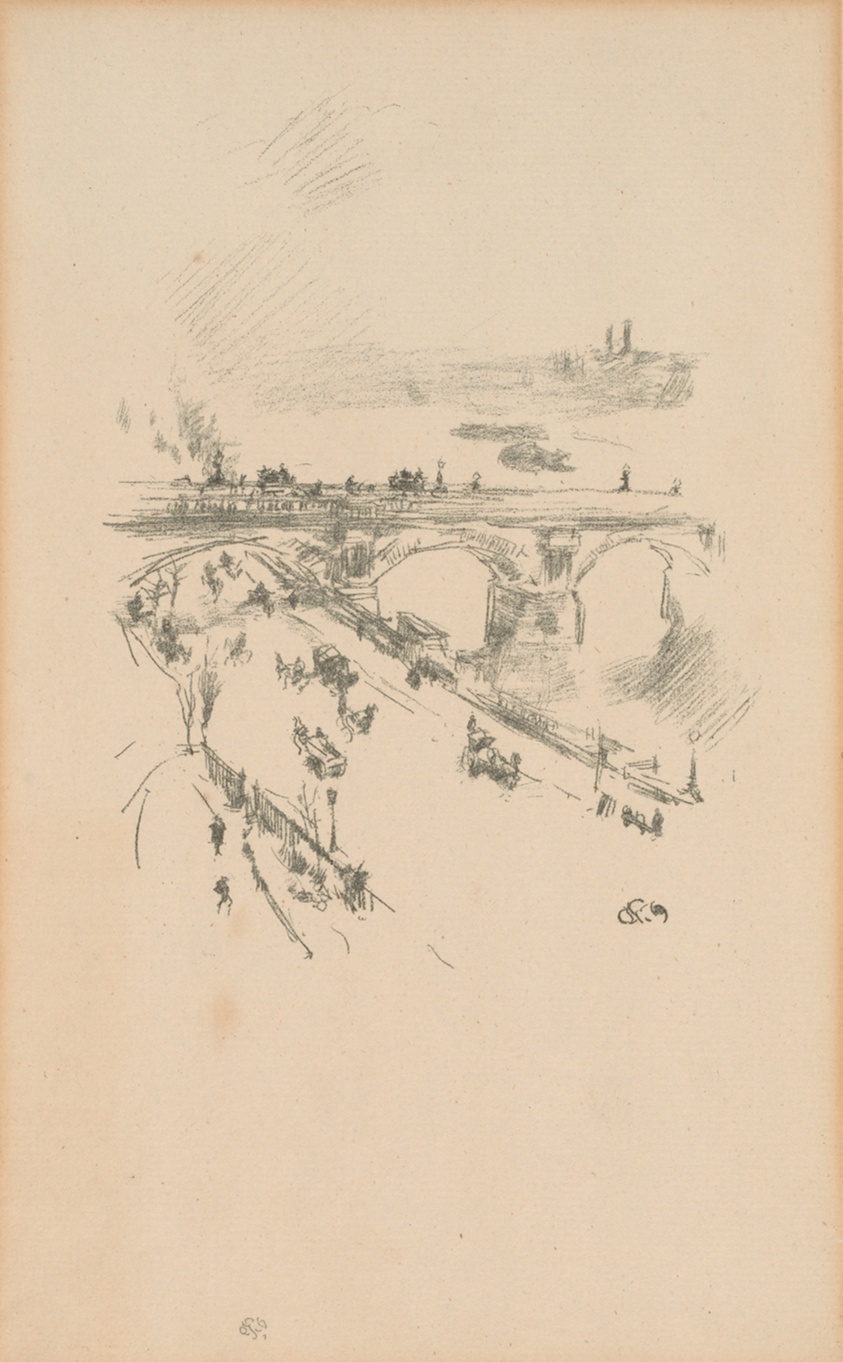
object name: Print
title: Waterloo Bridge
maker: James McNeill Whistler (American, 1834-1903)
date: 1896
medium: Transfer lithograph in black on ivory laid paper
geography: United States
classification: transfer lithograph; lithograph; print; prints and drawing; paper